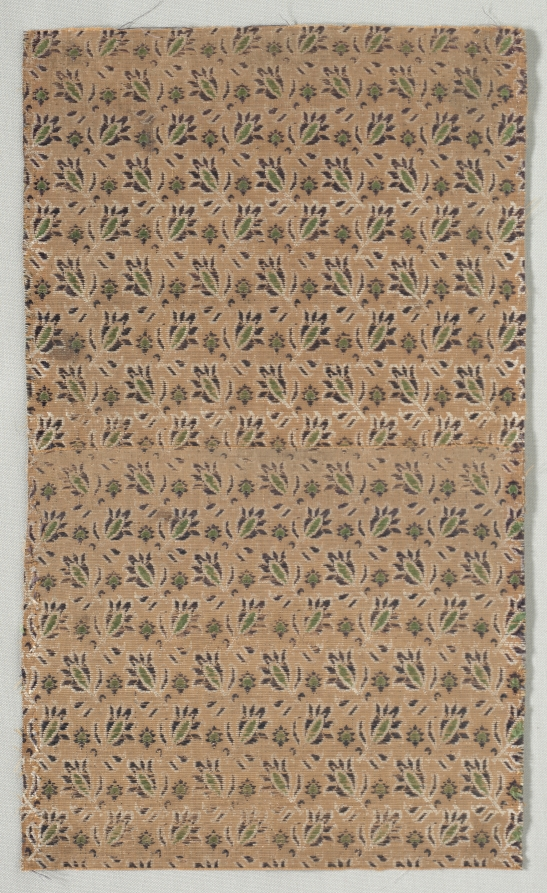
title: Silk Fragment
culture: Italy, early 17th century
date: early 1600s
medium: lampas weave, silk and metal thread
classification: Textile